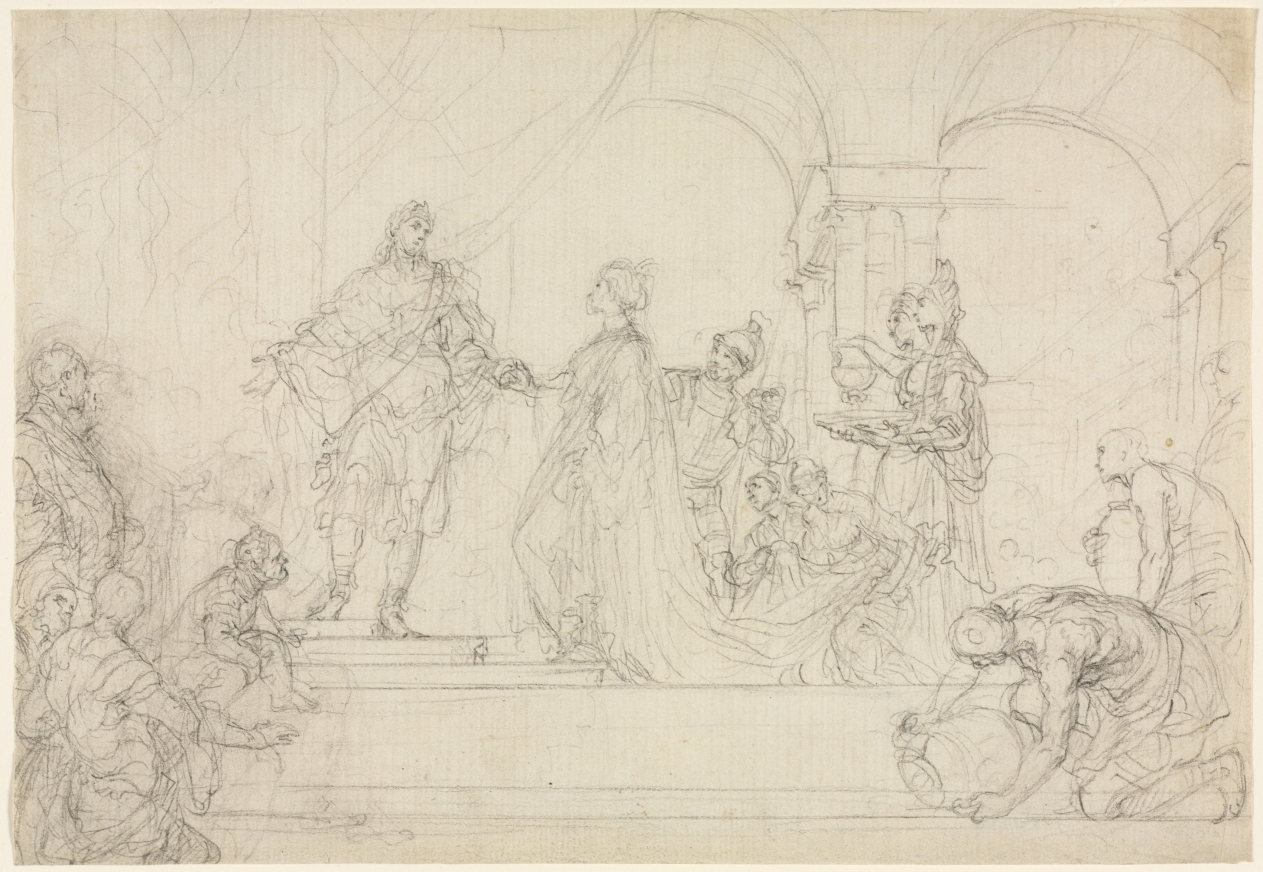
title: Meeting of Solomon and Queen of Sheba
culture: Italy, 18th century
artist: Francesco Solimena (Italian, 1657–1747)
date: late 1600s-1747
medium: black chalk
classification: Drawing